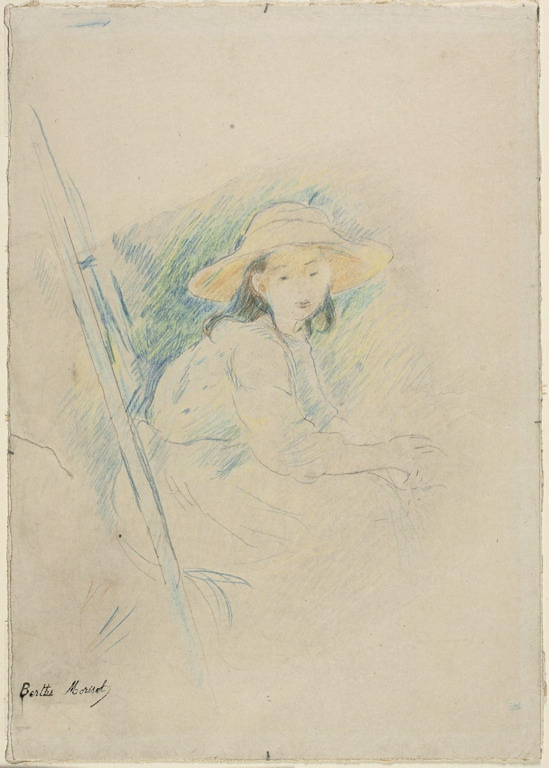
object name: Drawing and Watercolor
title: Seated Girl (Julie Manet)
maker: Berthe Morisot (French, 1841-1895)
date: c. 1890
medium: Colored pencils, over touches of graphite, on cream wove paper, laid down on cream wove paper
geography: France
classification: colored pencil; drawings (visual works); prints and drawing